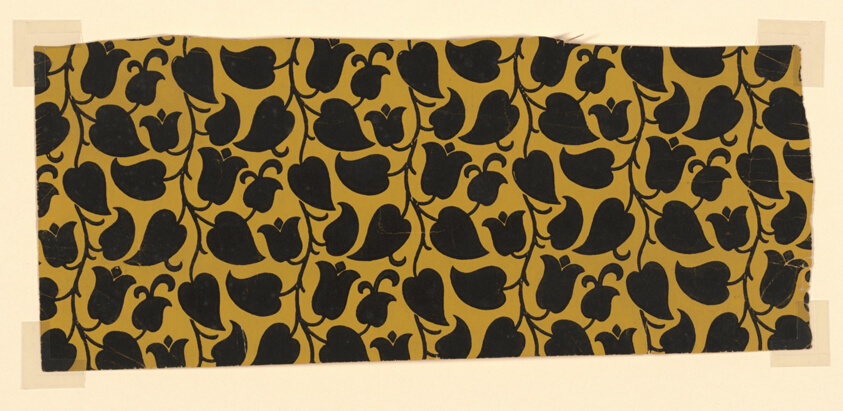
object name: Textile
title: Wurzblatt (Wallpaper Design)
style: Modernism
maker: Designed by Dagobert Peche (Austrian, 1887–1923); Manufactured by F. O. Schmidt; Austria, Vienna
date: c. 1915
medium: Ink, on paper; screen printed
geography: Vienna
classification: textile; accessory - paper design